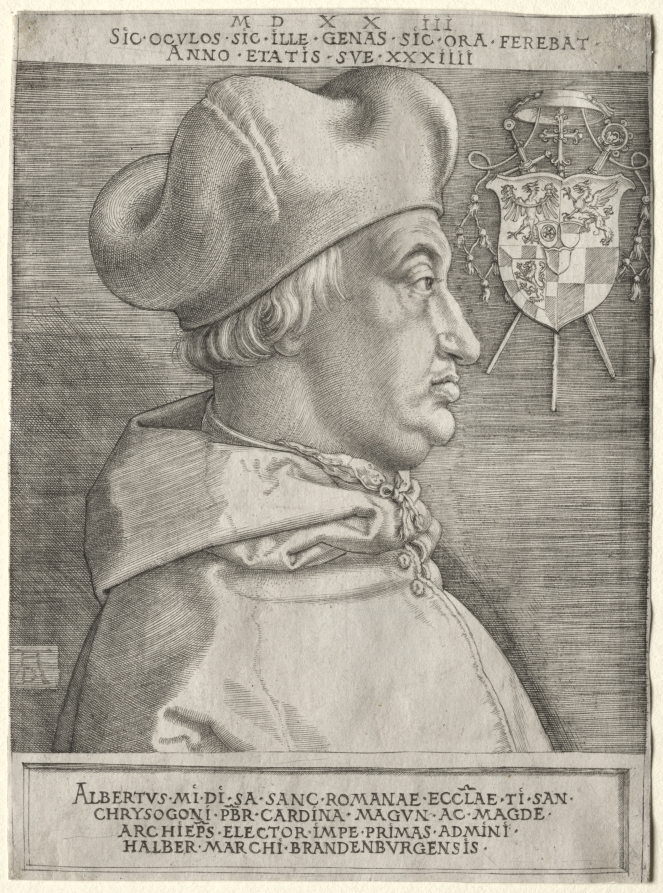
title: Cardinal Albrecht of Brandenburg - The Large Plate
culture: Germany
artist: Albrecht Dürer (German, 1471–1528)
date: 1523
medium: engraving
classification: Print